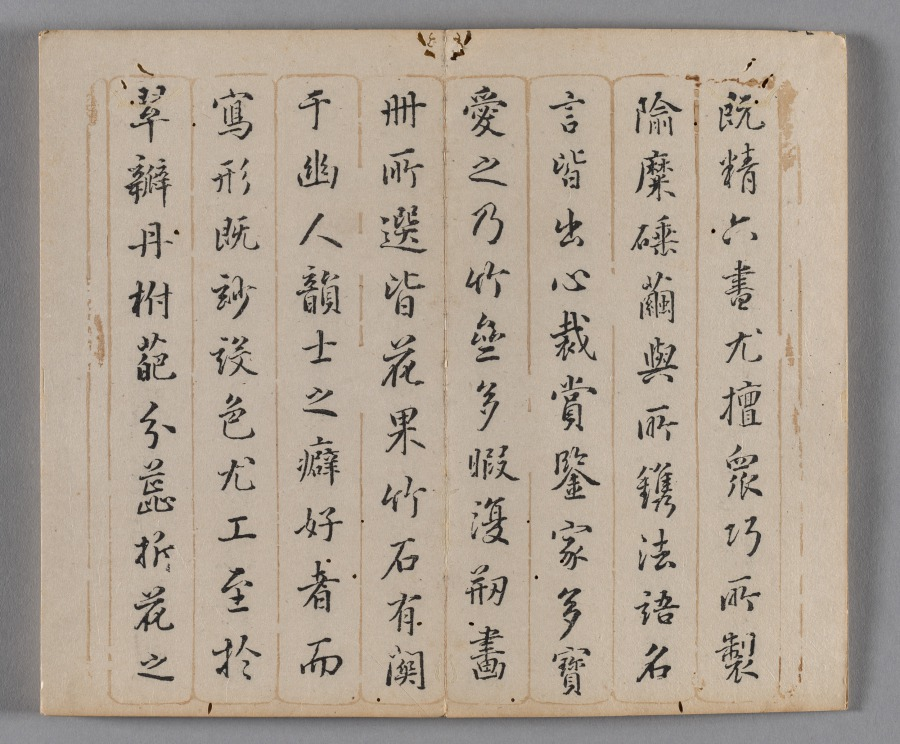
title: Ten Bamboo Studio Painting and Calligraphy Handbook (Shizhuzhai shuhua pu): Fruit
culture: China, Qing dynasty (1644-1911)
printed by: Hu Zhengyan (Chinese, c. 1584–1674)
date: 1633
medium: Woodblock-printed book; ink and colors on paper; first edition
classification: Print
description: Color printing reached a level of perfection in the early 1600s, as seen in this Ten Bamboo Studio Collection of Calligraphy and Painting and the Mustard Seed Garden Manual of Painting (printed 1679 and 1701). The painterly quality, precision in registering (aligning) the woodblocks, and harmonious colors made them the most successful color print editions in Chinese history. Both editions were printed and compiled in Nanjing, spread nationwide, and had a great impact on the arts in Japan and Korea.